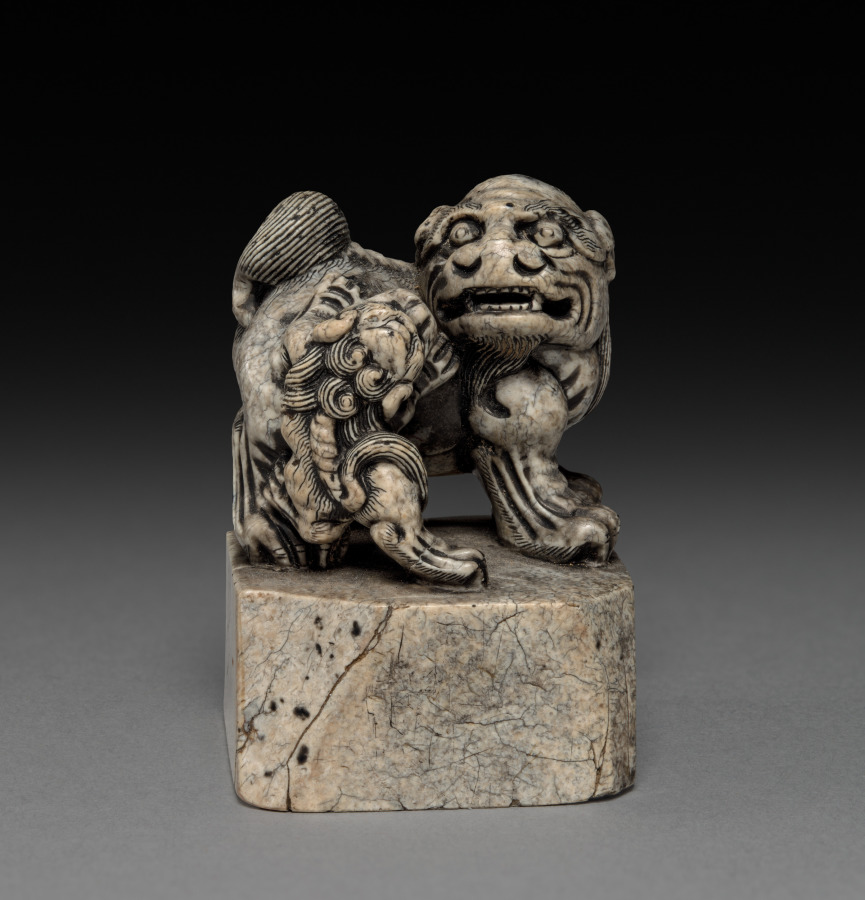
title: Seal: Lion and Cub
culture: China, Qing dynasty (1644-1911)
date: 1700s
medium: stone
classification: Stone